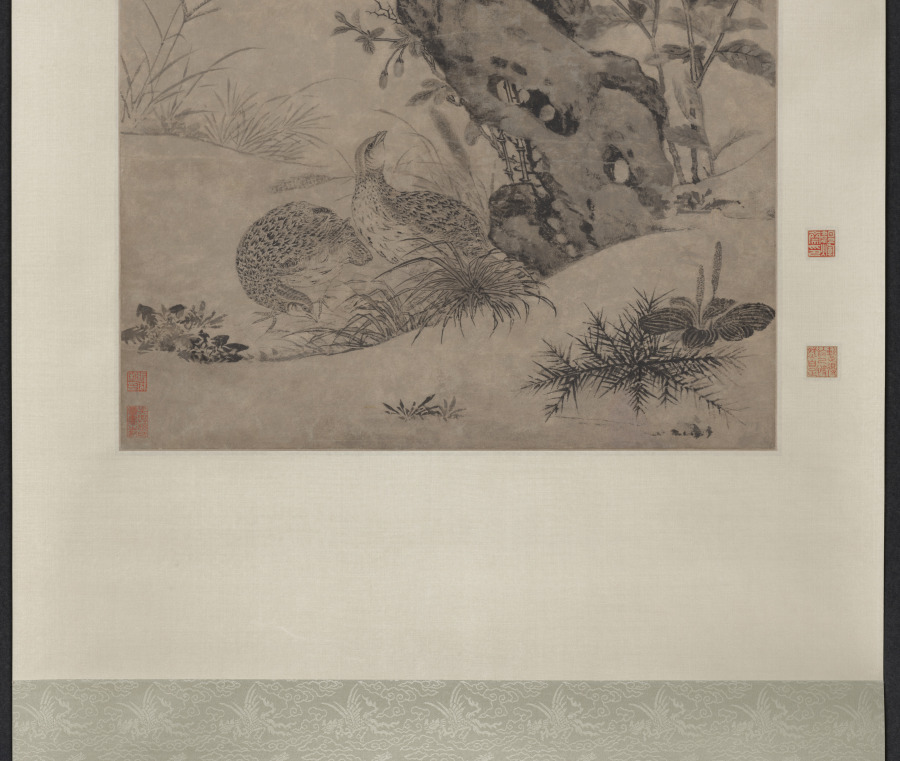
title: Quails and Sparrows in an Autumn Scene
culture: China, Yuan dynasty (1271-1368)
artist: Wang Yuan (Chinese, c. 1299-after 1366)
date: 1347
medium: hanging scroll, ink on paper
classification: Painting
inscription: 至正丁亥春 錢塘王淵若水寫秋景鶉雀圖 [印] 澹轩; [印] 若水; [印] 墨妙筆精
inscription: 翦翦輕風搖翠葆，團團清露滴金叢。 劍南畫手今何在，冷落賓榔枸杞新。 鐵篴 [印] 杨维桢印; [印] 廉夫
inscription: 1 inscription and 10 seals of the Qianlong emperor (r. 1736-95)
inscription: 4 seals of Zhang Heng 張珩 (1915-1963)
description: The flower-and-bird subjects here are depicted in a meticulous manner, echoing the academic tradition but translating the customarily colored images to plain monochrome. Fine ink lines combined with carefully graded washes define the contours and give subtle modeling to the natural forms. Wang Yuan excelled in flower-and-bird subjects as well as landscape and figure paintings. A child prodigy, he was instructed by the great Yuan master Zhao Mengfu at an early age.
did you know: Wang Yuan was from Qiantang, today’s Hangzhou in eastern China.